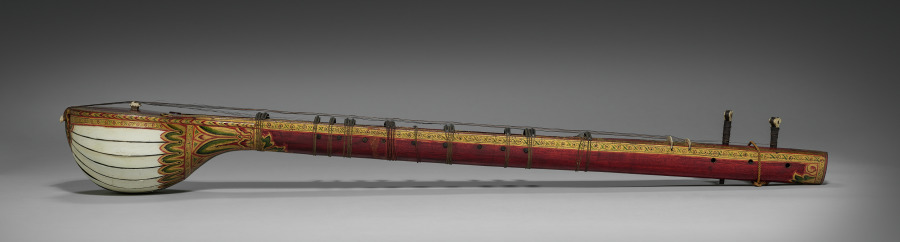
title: Sitar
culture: Eastern India, Bengal or Bangladesh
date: c. 1850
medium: Gourd and wood with pigment, ivory, and bone; copper alloy: frets; iron alloy: strings (with one modern copper replacement)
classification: Musical Instrument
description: The stringed instrument known as the sitar usually provided the central sound for the musical performances that were a constant feature of court life in India. The sitar could then be accompanied by percussion, voice, and other supporting instruments. In Raja Deen Dayal’s photograph Maharaja of Rewa in Prayer (2016.266.21), a musician strums a sitar in order to please the deities on the royal altar. The improvised compositions are played in a mode, or key, that correlates to the time of day and season of the year.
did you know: Many paintings of Indian court life depict female musicians holding and playing this kind of lightweight stringed instrument.